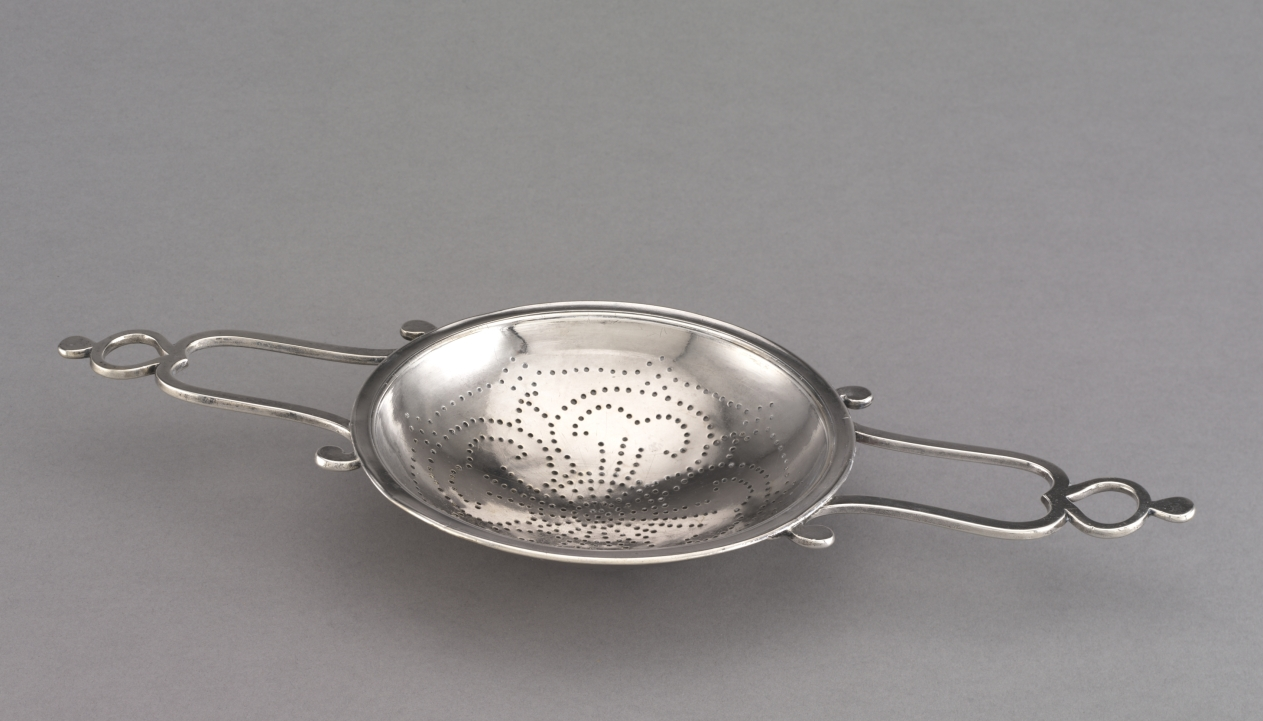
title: Strainer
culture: America, Massachusetts, Boston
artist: Paul Revere II (American, 1735–1818)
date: c. 1760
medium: silver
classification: Silver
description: A strainer was used to remove lemon seeds, cloves, and other debris from punch.